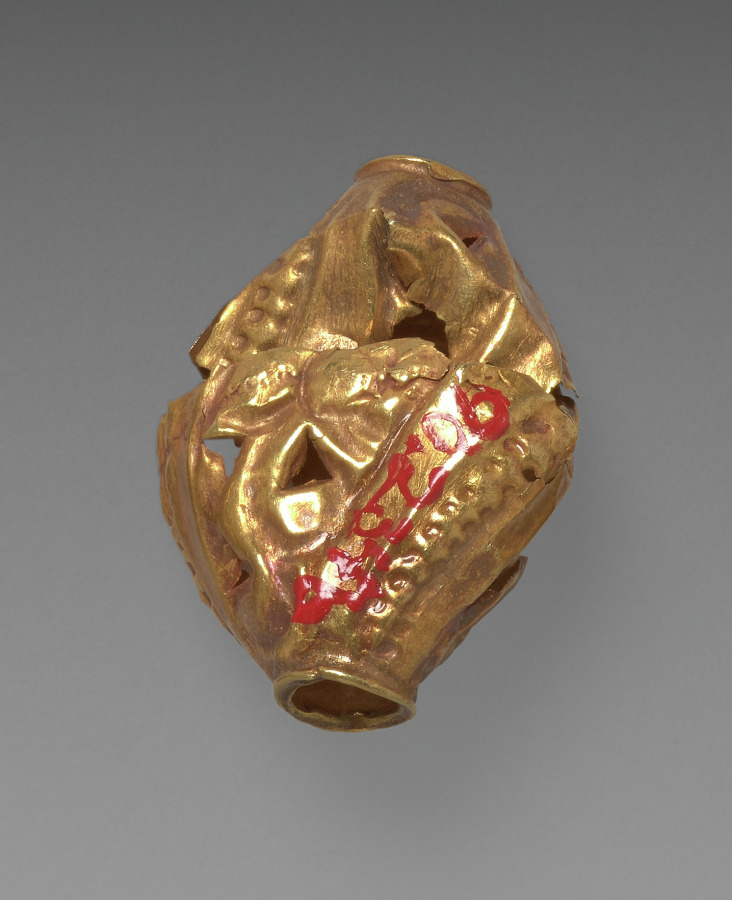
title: Bead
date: after 1519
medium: gold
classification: Jewelry